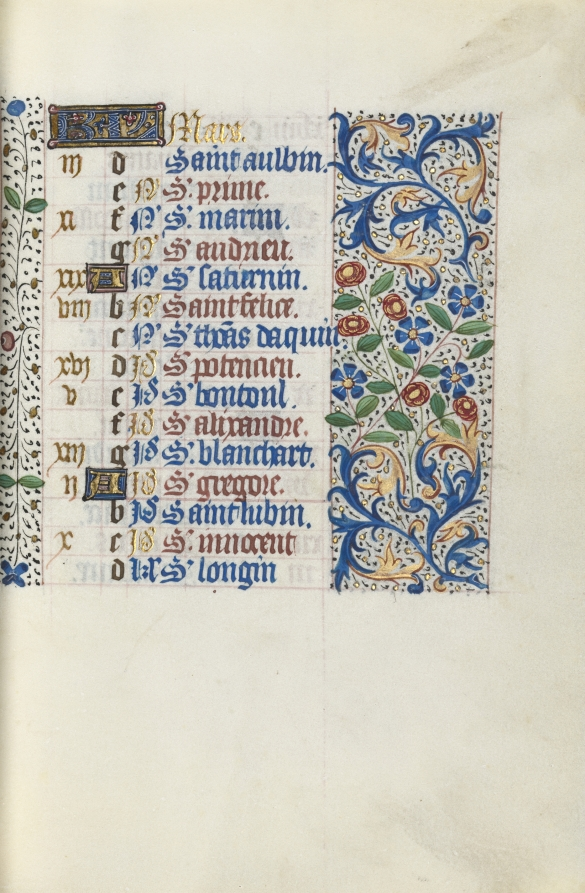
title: Book of Hours (Use of Rouen): fol. 3r, Calendar Page for March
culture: France, Rouen, 15th century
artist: Master of the Geneva Latini (French, active Rouen, 1460–80)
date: c. 1470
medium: ink, tempera, and gold on vellum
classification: Bound Volume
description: In the late 1400s and early 1500s Rouen was an established and important center of book production. The city’s cathedral had a wealthy chapter that spent large sums of money to commission books and to maintain its extensive library. The stationers and booksellers would have likely been concentrated in or near the cathedral precinct. This artist, named after a manuscript now in Geneva, was Rouen’s principal illuminator during the second half of the 1400s.